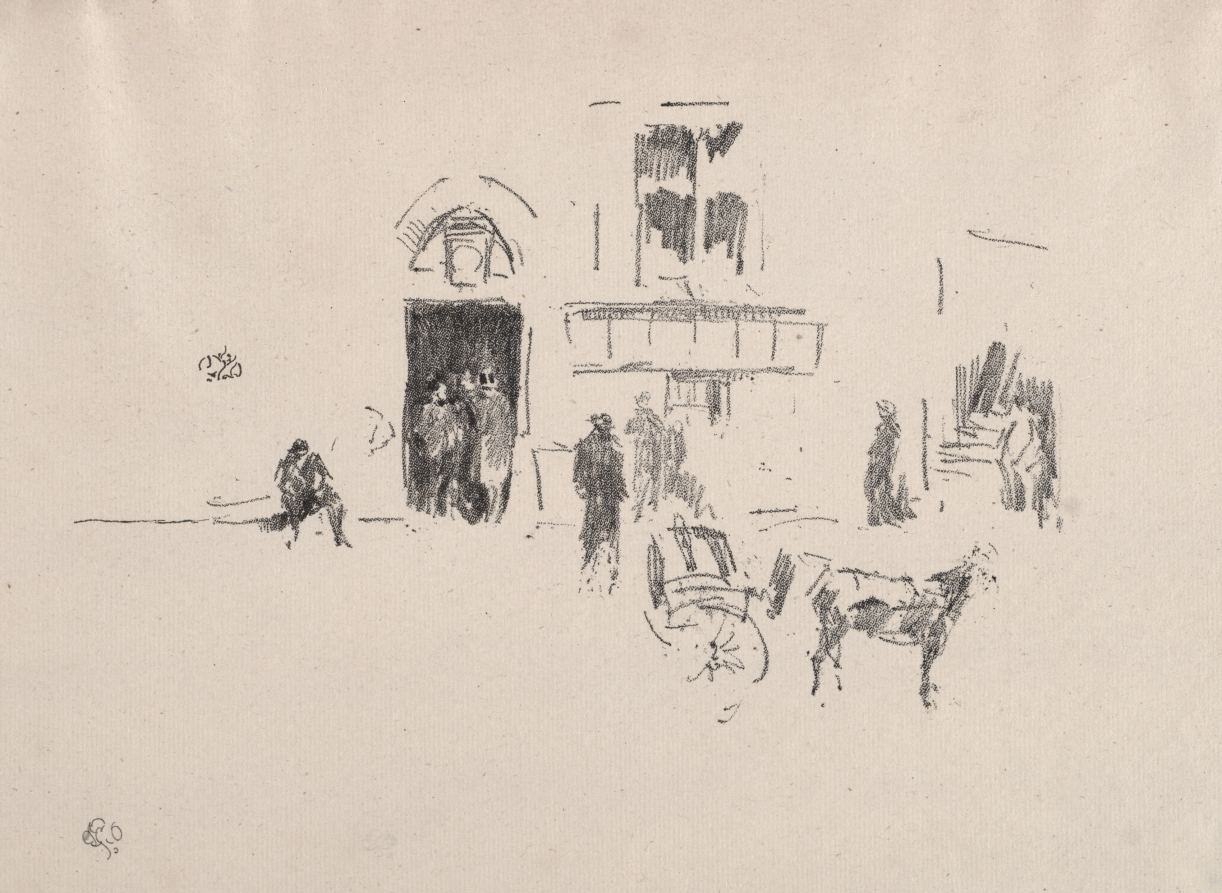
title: The Gaiety Stage Door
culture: America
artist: James McNeill Whistler (American, 1834–1903)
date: 1879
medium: lithograph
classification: Print